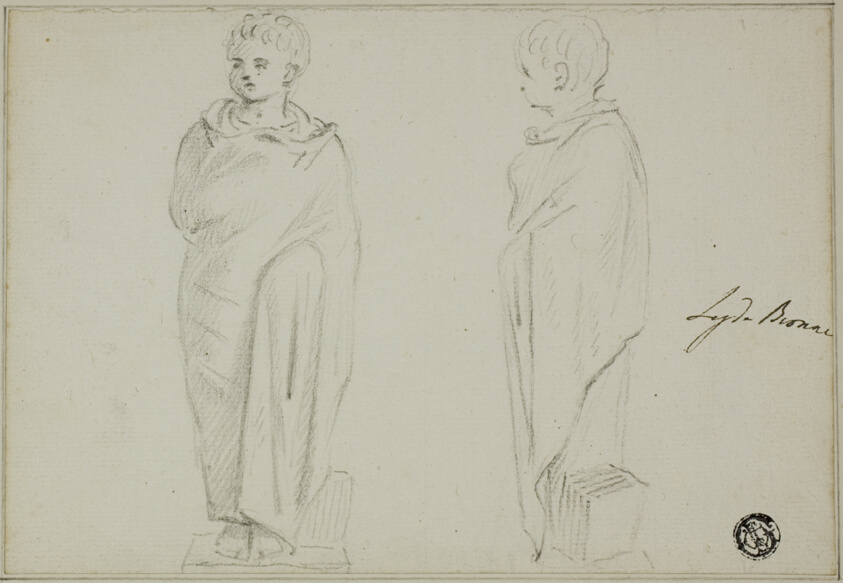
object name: Drawing and Watercolor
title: Frontal and Side Views of Statue of Boy Dressed in Toga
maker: Unknown Artist; United Kingdom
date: 18th century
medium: Black chalk, on cream laid paper, laid down on ivory wove paper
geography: United Kingdom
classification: chalk; drawings (visual works); prints and drawing